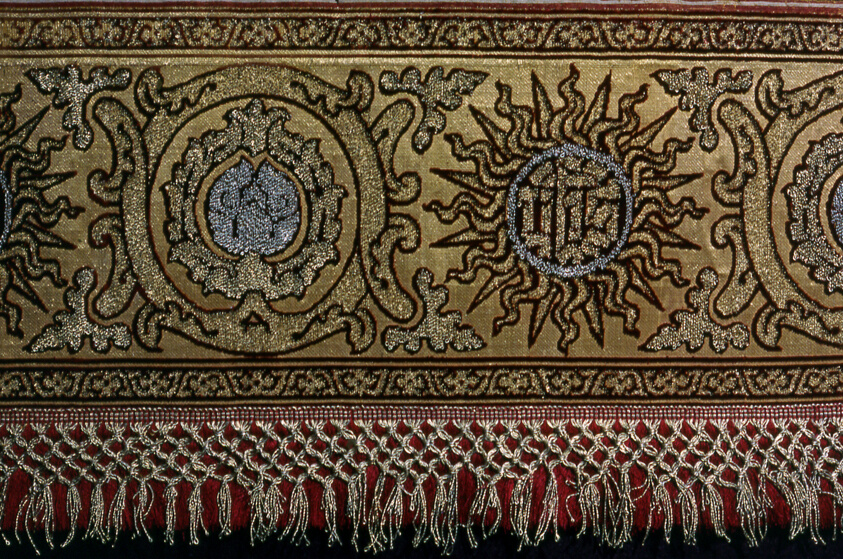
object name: Textile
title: Portion (From Altar Frontal)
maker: Italy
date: 1501/25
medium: Silk, plain weave variation with silk supplementary wefts and weft-float faced 1:2 twill interlacings of secondary binding warps and gilt- and silvered-metal-strip-wrapped silk, supplementary facing and supplementary brocading wefts forming weft loops and supplementary pile warps forming cut voided velvet; edged with silk and gilt-metal-strip-wrapped silk, plain weave with supplementary patterning wefts with extended supplementary patterning weft knotted uncut fringe and over extended ground weft cut fringe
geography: Italy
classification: textile; weaving - velvet